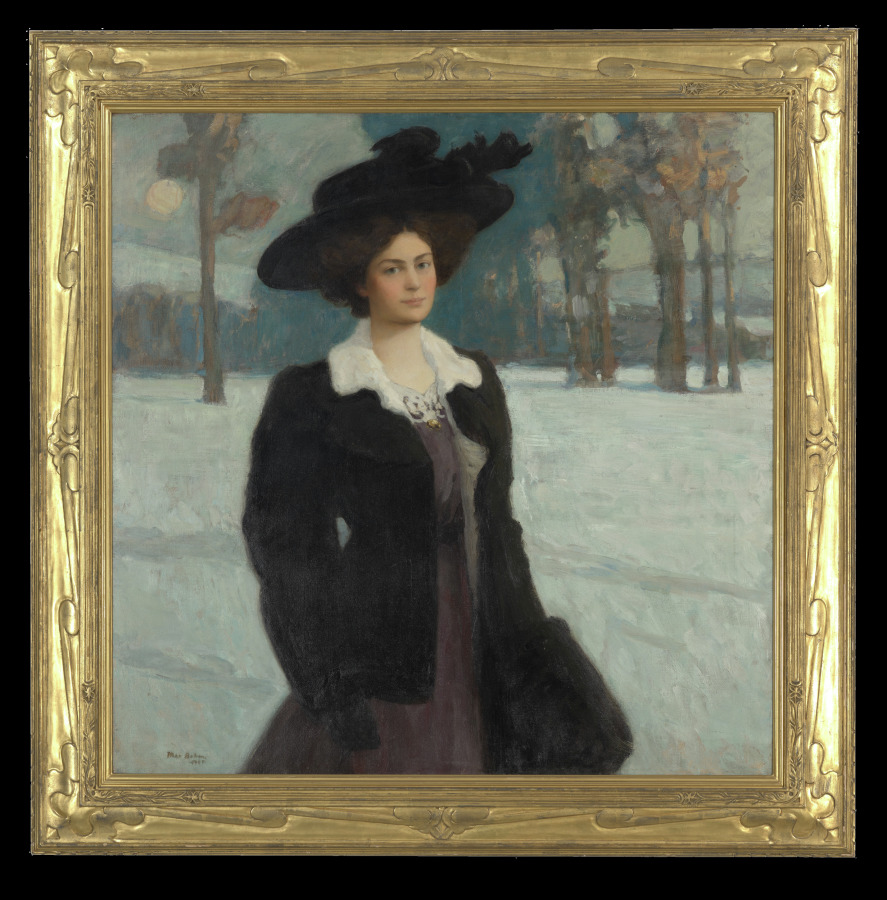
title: Lucy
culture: America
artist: Max Bohm (American, 1868–1923)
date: 1909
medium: oil on canvas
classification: Painting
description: Painted during expatriate Max Bohm’s visit to his hometown in Cleveland, Lucy depicts a former love interest, who years earlier turned down the artist’s marriage proposal because she doubted his ability to earn a steady income. During the intervening time, Bohm had wed someone else and established himself as a noted painter, earning success particularly in France and England.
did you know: Bohm created this painting while working on a commissioned mural for the Cuyahoga County Courthouse.